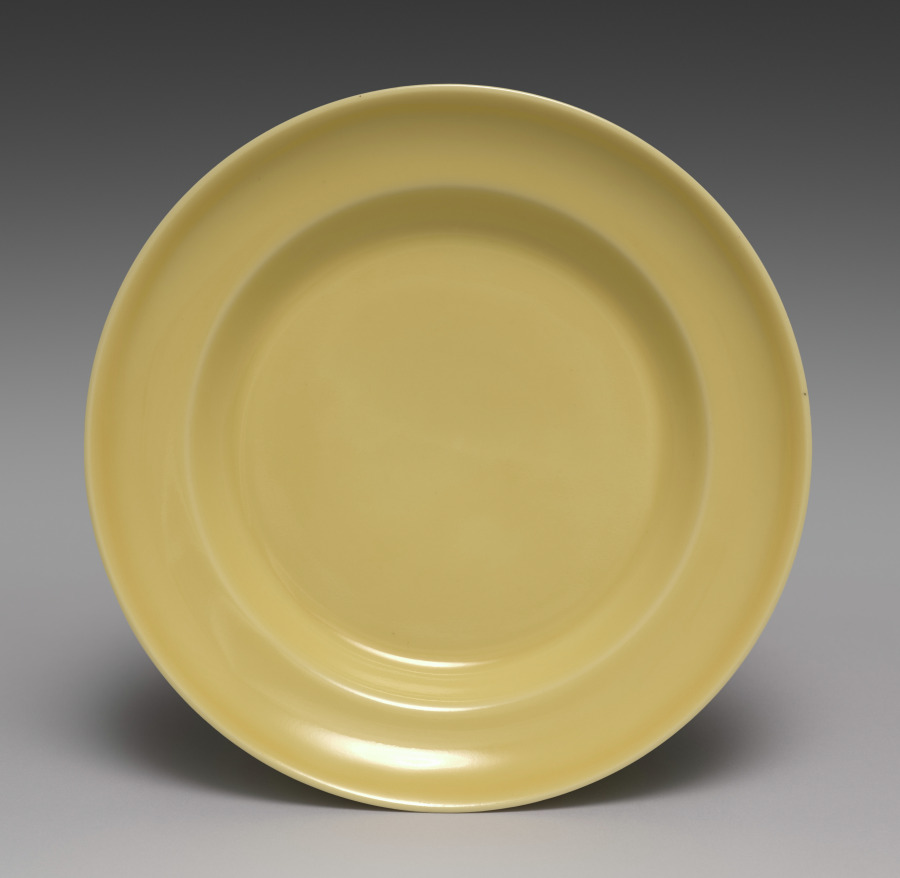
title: Sweets Bowl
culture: Japan, Meiji period (1868–1912)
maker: Seifū Yohei III (Japanese, 1851–1914)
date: 1893–1914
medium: Glazed porcelain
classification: Ceramic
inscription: 清風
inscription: 金聲玉振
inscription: 帝室技芸員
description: Seifū Yohei III was the most prominent head of a ceramics studio in Kyoto that specialized in Chinese-style porcelains and especially items for use in sencha (煎茶), or the drinking of steeped-leaf tea with companions. Sencha was popular among the bunjin of Kyoto and Osaka, who often enjoyed it as part of their emulation of Chinese culture. While sencha was by design less formal than the Japanese tea ceremony, it still featured the display of treasured objects. Prized Chinese antiquities were generally unobtainable, so substitutes such as the Gu-Shaped Flower Vase, CMA 2022.224, were much in demand. Bowls for distributing sweets, like this one, were also a staple of sencha gatherings.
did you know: Names for the glazes, written in ink with a brush on the lids of the custom-made storage boxes for the works, often indicate a specific glaze or ware that had inspired Seifū Yohei III.